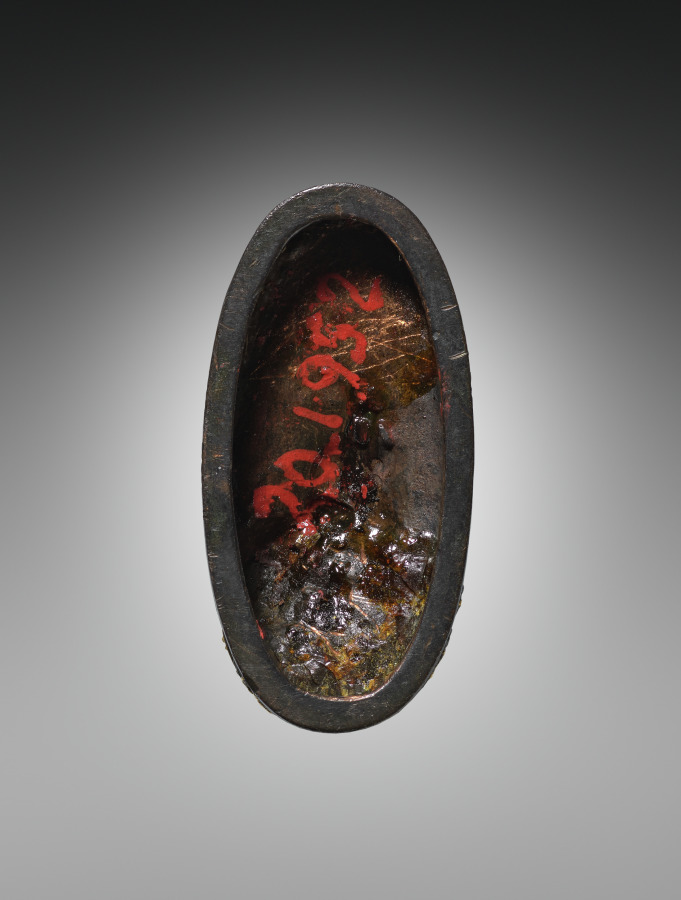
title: Sword-Hilt Pommel (Kashira)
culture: Japan, Edo period (1615–1868)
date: 1700–1850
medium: shakudo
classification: Arms and Armor